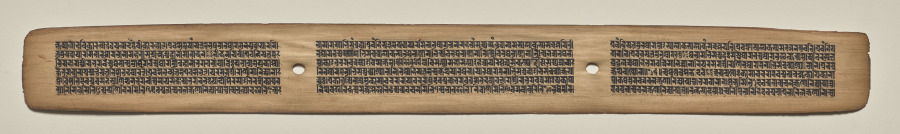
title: Text, Folio 96 (recto), from a Manuscript of the Perfection of Wisdom in Eight Thousand Lines (Ashtasahasrika Prajnaparamita-sutra)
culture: Eastern India, Bihar, Vikramashila Monastery. Painting: Nepal, Kathmandu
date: Sunday, September 14, 1119 (year 239 of the Newar Samvat in the month of Ashvina)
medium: gum tempera and ink on palm leaves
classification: Painting